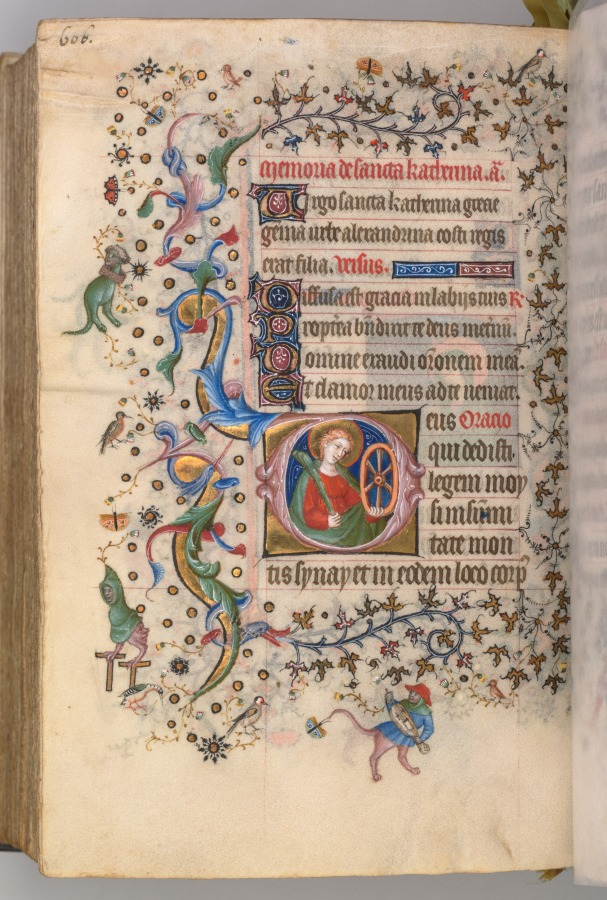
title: Hours of Charles the Noble, King of Navarre (1361-1425): fol. 297v, St. Catherine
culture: France, Paris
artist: Master of the Brussels Initials and Associates (French)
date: c. 1405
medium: ink, tempera, and gold on vellum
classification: Bound Volume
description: This precious volume was obviously highly prized by its owner, the French-born King of Navarre, who had his coat of arms painted on no less than twenty folios. Rather than directly commissioning this manuscript from a specific workshop, it seems that Charles the Noble acquired his book of hours -- perhaps ready-made for the luxury market -- while on a trip to Paris in 1404-05. A collaborative effort, six painting styles are evidenced within the pages of this codex, those of two Italians, two Frenchmen, and two Netherlanders. The painter who was responsible for the planning and decoration of the book, and who produced seventeen of the large miniatures, was a Bolognese artist known as the Master of the Brussels Initials. His principal assistant, responsible for most of the borders, was a Florentine who signed his name "Zecho" da Firenze on folio 208 verso.